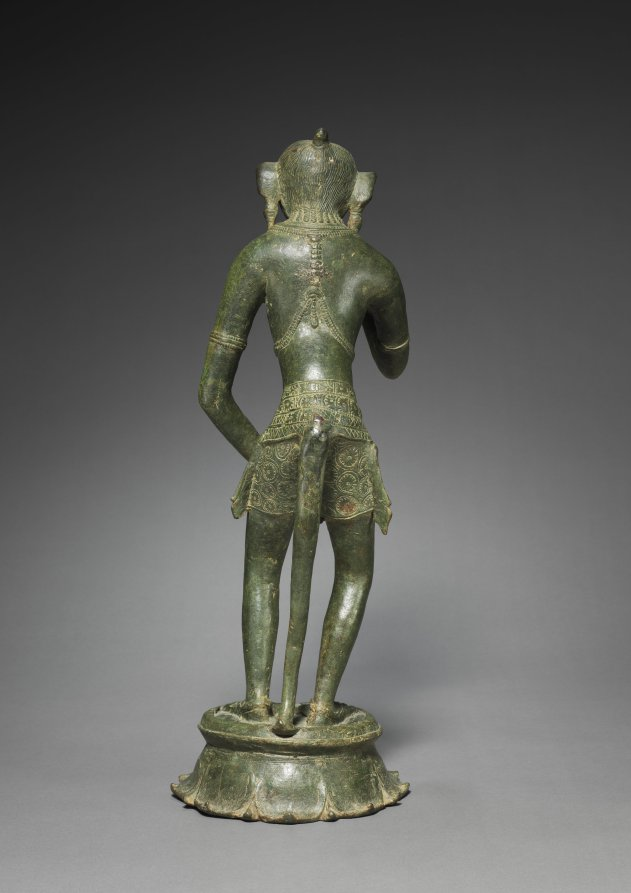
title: Monkey General Hanuman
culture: Southern India, Chola period (900s–1200s)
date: c. 1000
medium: bronze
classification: Sculpture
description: Hanuman is one of the most popular heroic figures of the epic Ramayana. In the story, he was indispensable in the search for the abducted wife of Rama, an incarnation of Vishnu. He is able to fly through the air and lift mountains, but here he is shown as a humble servant of the god. His gestures signify his humility and he bows slightly in reverence to his master. Bronzes during the Chola period spanning the 800s to 1200s were solid cast, using the lost-wax method. Each one is unique and would have been kept in the treasury of the temple until the festival day when the presence of the deity is invited to reside in the sculpture, which is then bathed, dressed, and paraded through the streets. This figure would have been paraded with a group of other images depicting Rama, his wife, and his brother.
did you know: Hanuman stands on a lotus pedestal with slightly upturned petals.